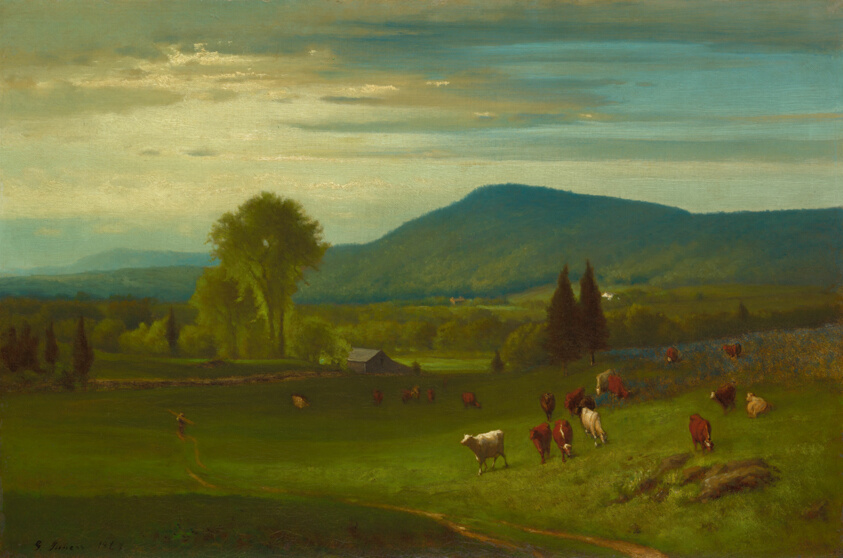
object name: Painting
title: Summer in the Catskills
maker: George Inness (American, 1825–1894)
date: 1867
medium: Oil on canvas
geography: United States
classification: painting; american arts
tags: landscapes